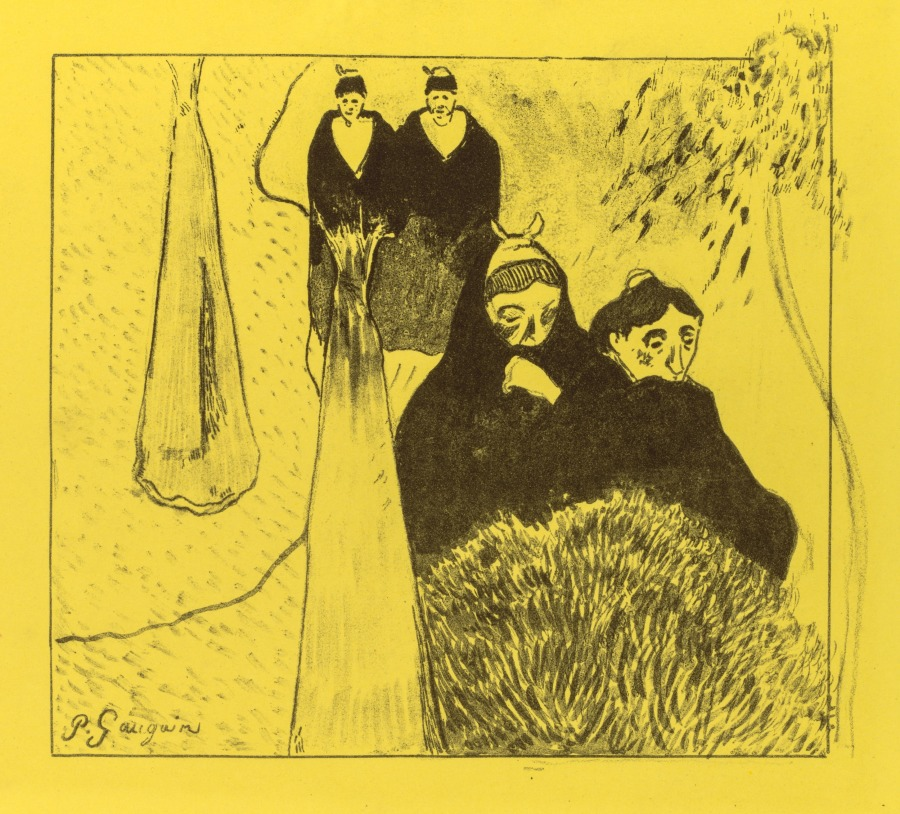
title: Volpini Suite: Old Women of Arles (Les Vieilles Filles [Arles])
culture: France, 19th century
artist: Paul Gauguin (French, 1848–1903)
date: 1889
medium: zincograph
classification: Print